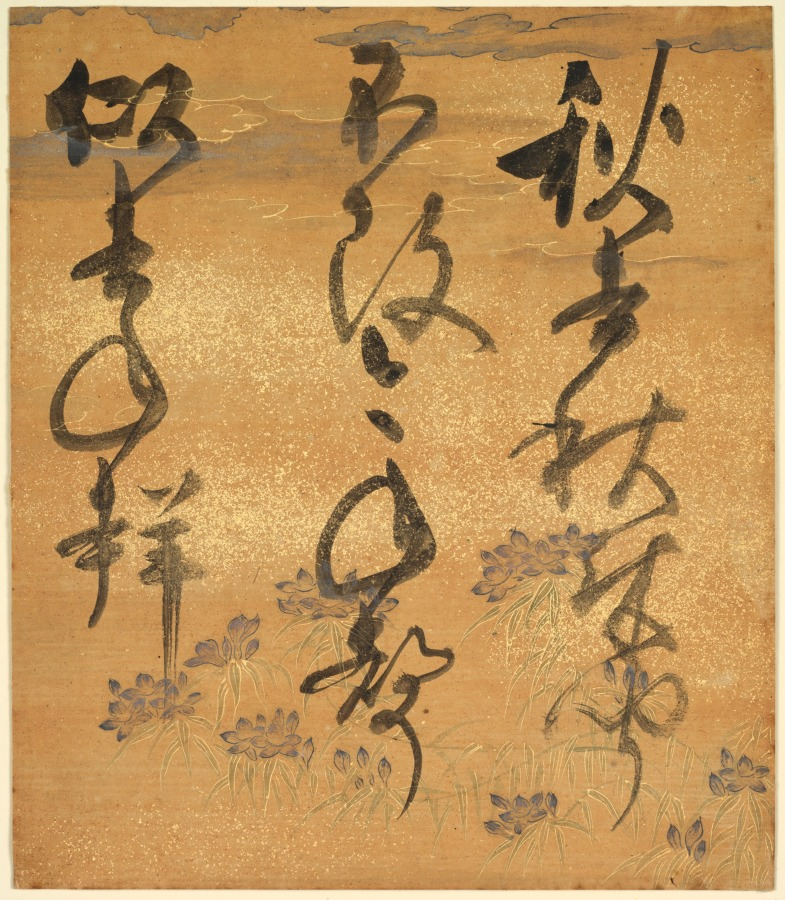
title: Portion of a Poetry Anthology: Cicada, from "Shinsen Roeishu"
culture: Japan, Momoyama period (1573–1615)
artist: Konoe Nobutada (Japanese, 1565–1614)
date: late 1500s-early 1600s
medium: ink, color, gold, and silver on paper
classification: Calligraphy